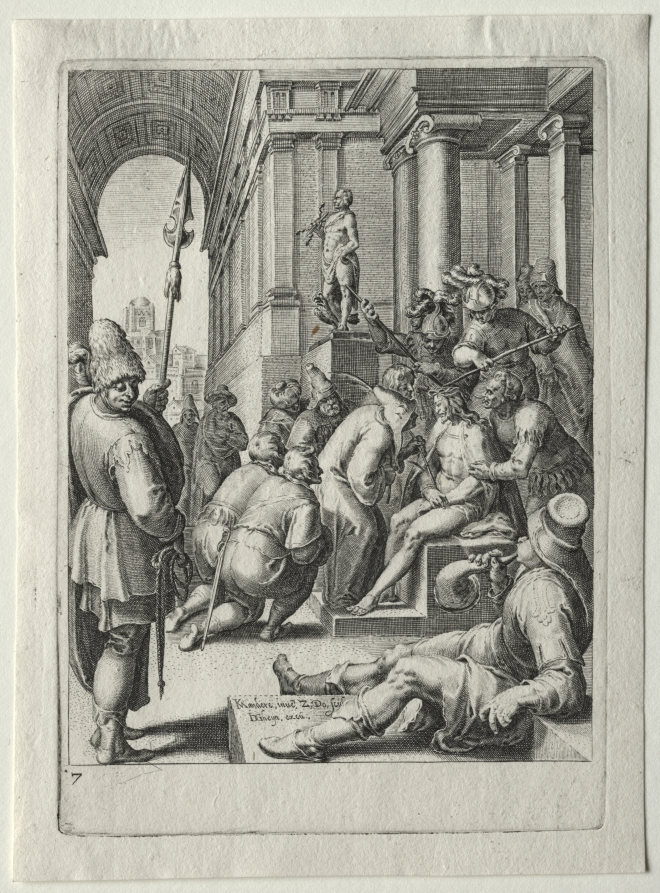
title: Passion Set: Christ Crowned with Thorns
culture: Netherlands, 16th century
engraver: Zacharias Dolendo (Dutch, 1561–1604)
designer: after Karel van Mander I (Dutch, 1548–1606)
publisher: Jacob de Gheyn II (Netherlandish, 1565–1629)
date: 1596–98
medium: engraving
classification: Print